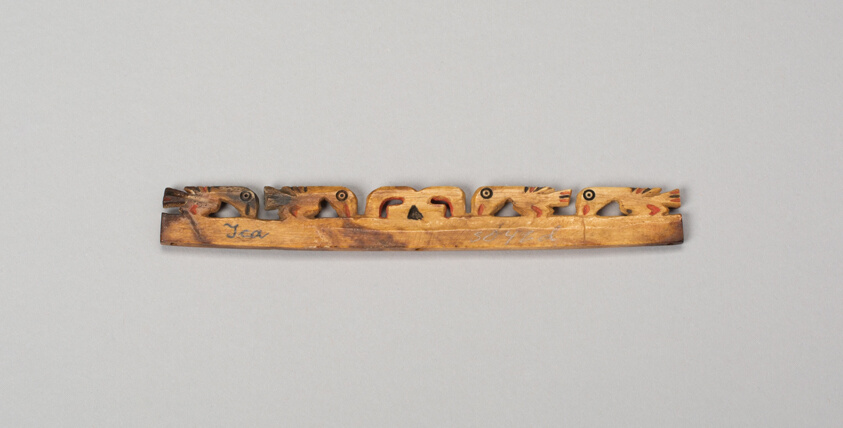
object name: Decorative Arts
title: Balance-Beam Scale with Cut-Out Birds and Geometric Motifs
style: nazca, early intermediate period, Pre-Columbian, americas, Arts of the Americas, andean, andes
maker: Possibly Nazca; South coast, Peru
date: 500–800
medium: Bone with pigment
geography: Peru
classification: bone; american decorative arts; tool; decorative arts; art of the americas